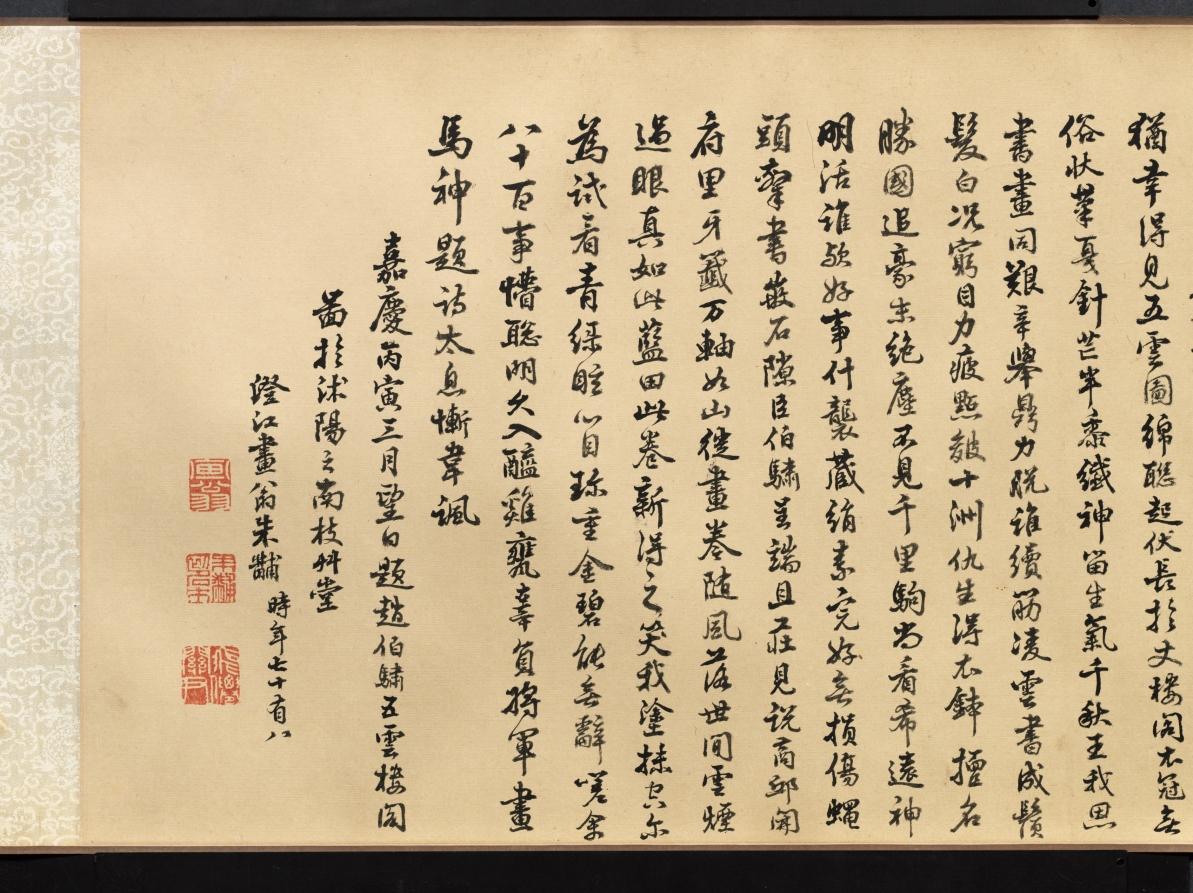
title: Landscape, The Palace of the Clouds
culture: China, Qing dynasty (1644-1911)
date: 1644–1911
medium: handscroll, ink on silk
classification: Painting